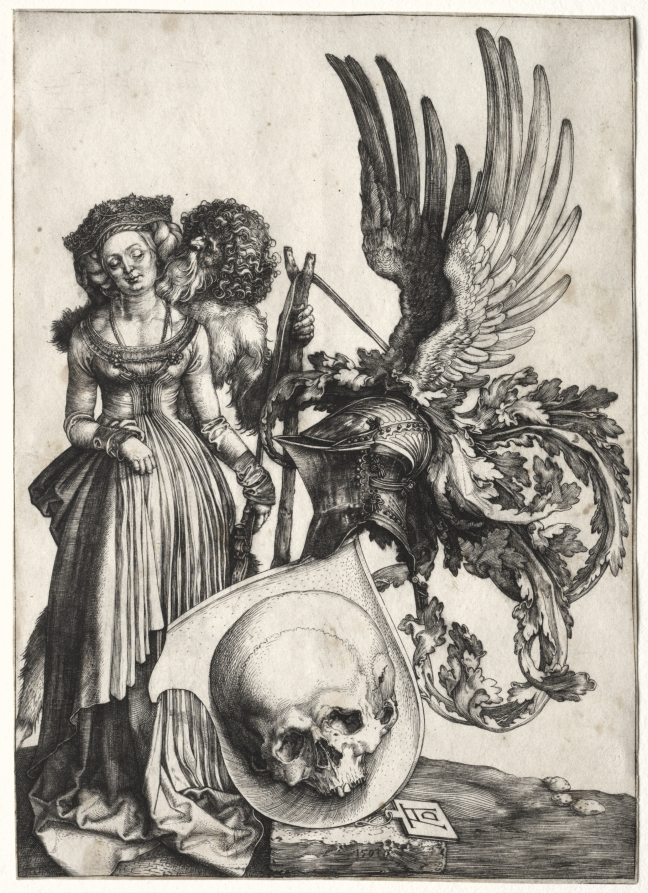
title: Coat of Arms with a Skull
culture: Germany, early 16th Century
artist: Albrecht Dürer (German, 1471–1528)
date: 1503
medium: engraving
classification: Print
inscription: lower center, in plate: 1503 ; lower center, in plate: AD[in monogram] ; VERSO, lower right, in pen and brown ink: P. mariette 1667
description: In this visual allegory, Dürer creatively entangled themes of love and death. The hairy wild man, a traditional medieval figure of virility, lust, and aggression, plays the role of lover to a maiden dressed in alluring clothing. The skull on the fanciful coat of arms is a bold reminder that vanity and illicit desire carry a mortal price.